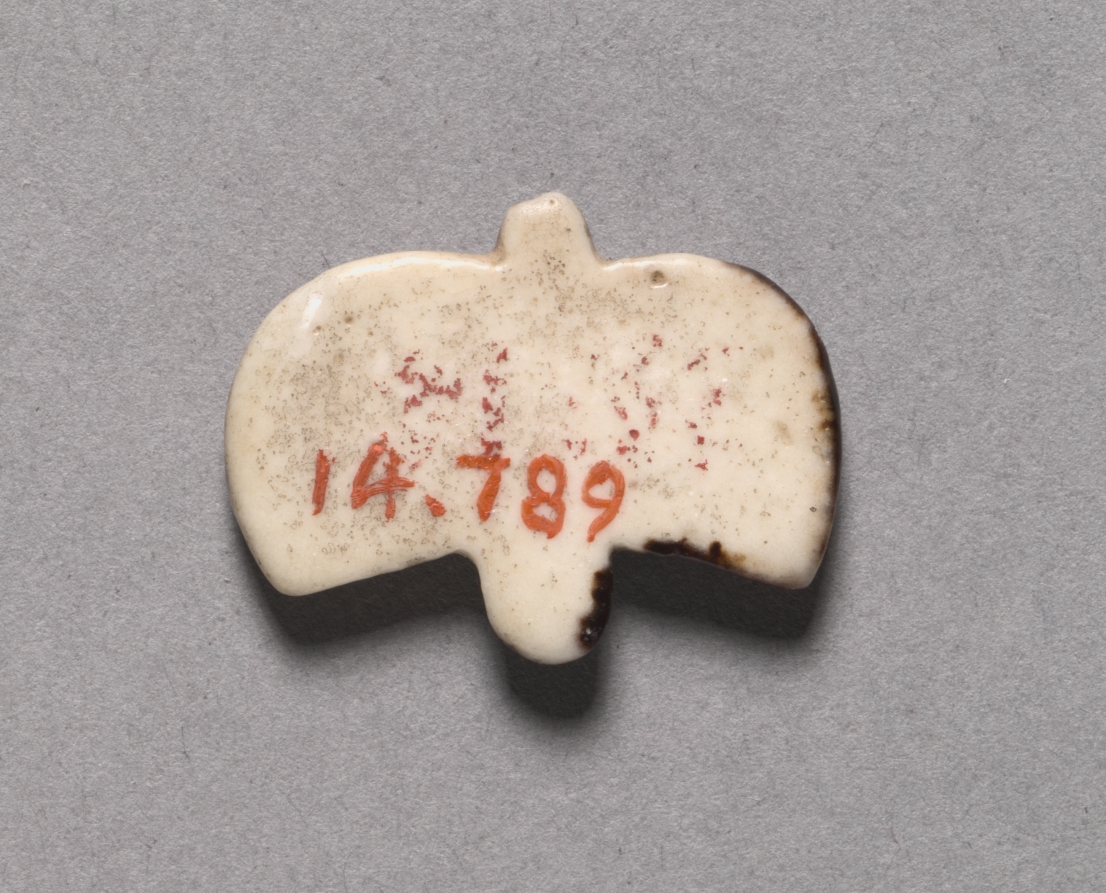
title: Butterfly Inlay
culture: Egypt, New Kingdom (1540–1069 BCE), Dynasty 18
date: 1350–1296 BCE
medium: polychrome faience with painted decoration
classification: Amulets